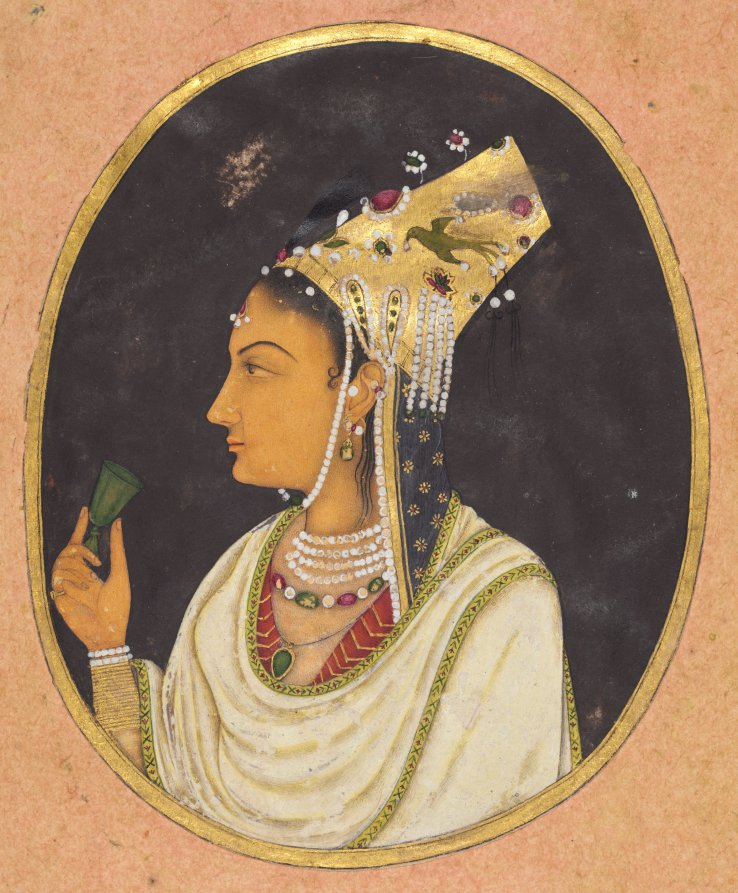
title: Oval portrait of a woman in a Chaghtai hat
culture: India, Mughal, 18th century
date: c. 1740–50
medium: Gum tempera and gold on paper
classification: Painting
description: The tall, flat-topped hat is an element of the native dress of the Mughals from eastern Uzbekistan. Of mixed Turkic and Mongol ethnicities, they spoke a Turkic language known as Chaghatai. Chaghatai refers to the name of the son of the Mongol Chingiz (Genghis) Khan, who ruled this area of Central Asia from 1246 to 1282. This woman’s hat has been studded with jewels and strings of pearls. The portrait jewel format that was once reserved for the emperor has now been expanded to include ladies of the court. The woman holds a jade wine cup and wears a draped upper garment with a woven or embroidered border similar to the fragment on display at the left.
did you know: She holds a delicate jade cup of the type for which the Mughals were famous.